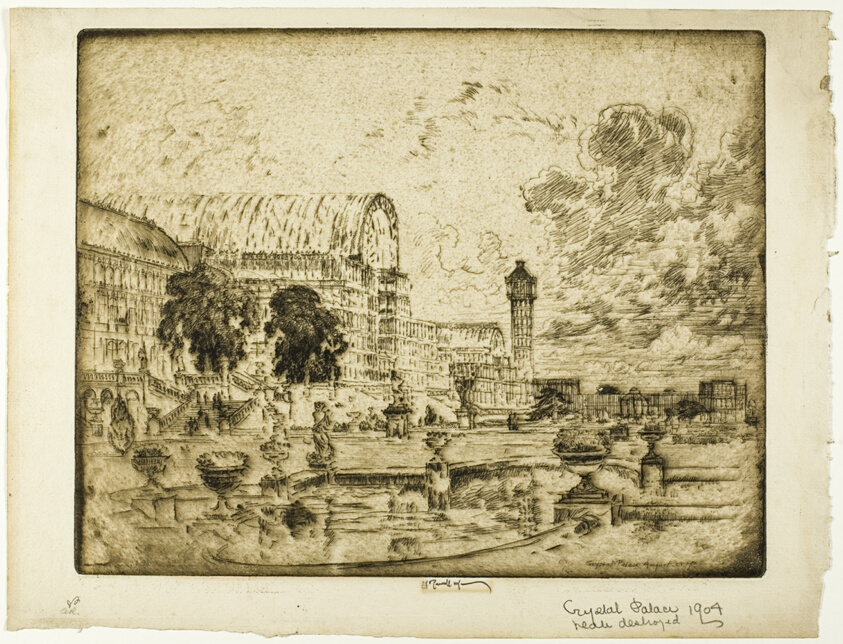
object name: Print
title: The Crystal Palace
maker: Joseph Pennell (American, 1857-1926)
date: 1905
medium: Etching on ivory laid paper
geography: United States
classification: etching; print; prints and drawing